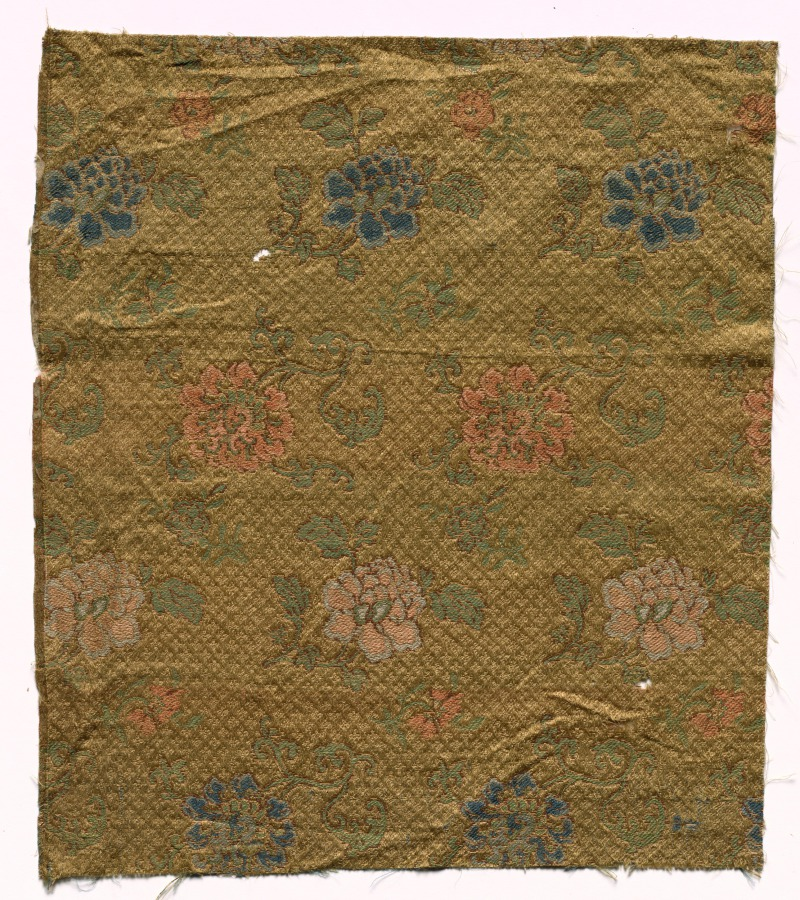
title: Silk Damask Fragment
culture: China, Qing dynasty (1644-1911)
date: 1800s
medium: silk, damask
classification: Textile